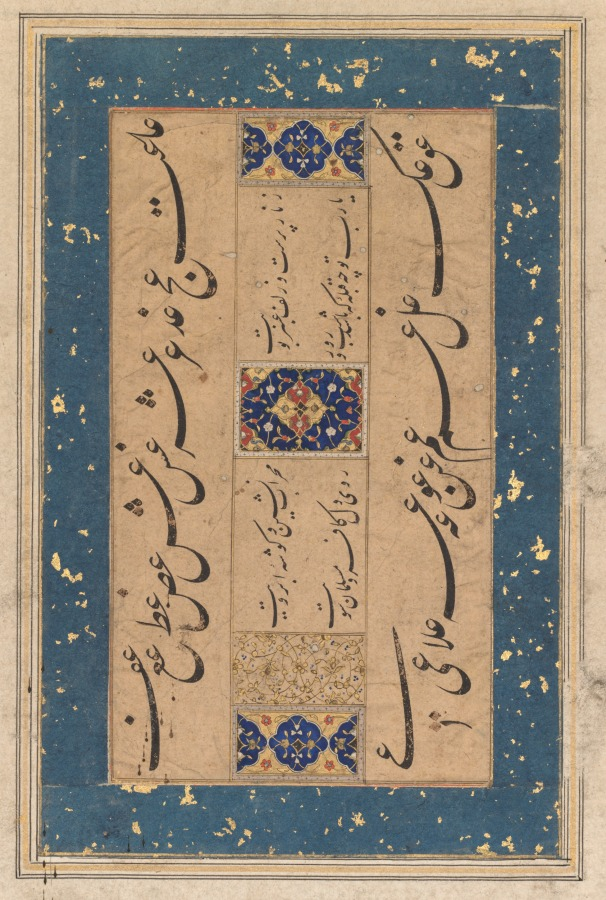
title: Persian ruba‘i (quatrain) by Maulana Muḥammad Murshidi Zawara’i (Persian, late 1500s–early 1600s) (verso)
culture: India, Mughal, 17th century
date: c. 1610–1620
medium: Gum tempera, ink, and gold on paper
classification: Calligraphy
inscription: verso: four lines of nast 'aliq calligraphy with illuminated panels, with illuminated panels, ink gold and opaque watercolor on paper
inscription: Calligraphy in nasta‘liq script: A Christian with his zonnar string and your amber locks, A pious ascetic in a prayer niche and the angle of your eyebrows, O Lord! What kind of a qibla are you That night and day the hearts of both Muslims and Infidels are turned toward you?